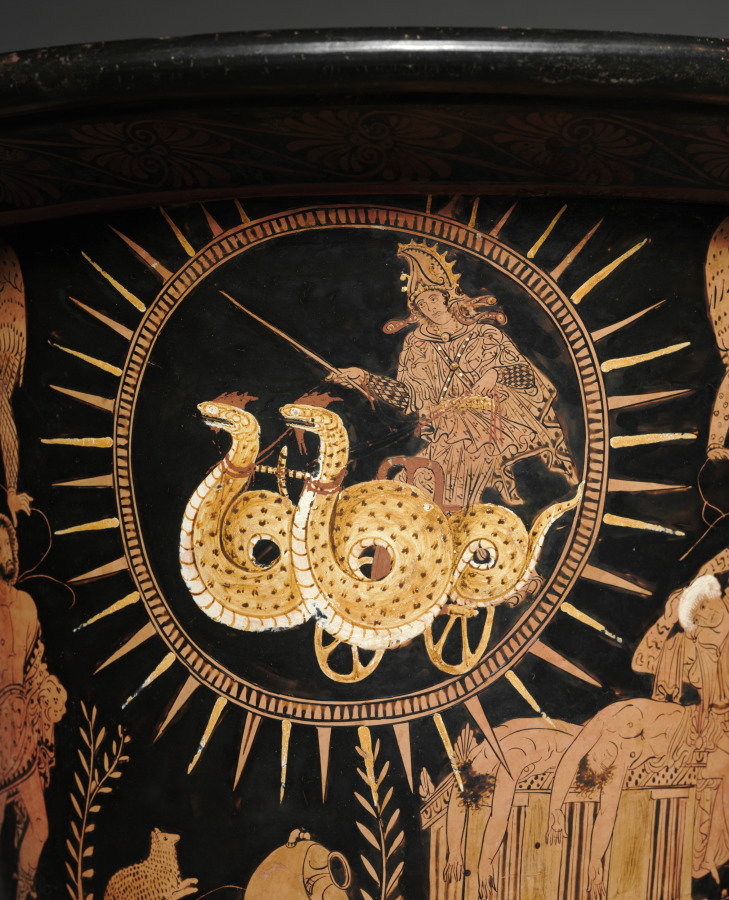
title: Red-Figure Calyx-Krater (Mixing Vessel): Medea in Chariot (A); Telephos with Baby Orestes (B)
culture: South Italian, Lucanian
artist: near the Policoro Painter (South Italian, Lucanian, active c. 400 BCE)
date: c. 400 BCE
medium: ceramic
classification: Ceramic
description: The remarkable scene on the front of this vase relates to the famous tragedy Medea, written by Euripides and first produced in Athens in 431 BC. Framed in the center by a halo (recalling her sun god grandfather Helios), the sorceress Medea flies off in a dragon-drawn chariot. Seeking revenge against her husband Jason, leader of the Argonauts, Medea has just slain their two children. Two Furies flank her, while Jason and a distraught nurse and teacher approach the bodies on the altar below. A different tragedy unfolds on the other side of the vase, from Euripides’s Telephos (438 BC). The wounded warrior Telephos holds the baby Orestes hostage at an altar, with Agamemnon and Clytemnestra rushing to save their son.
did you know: This vase includes scenes connected to two Athenian tragedies dealing with children—Medea and Telephos.